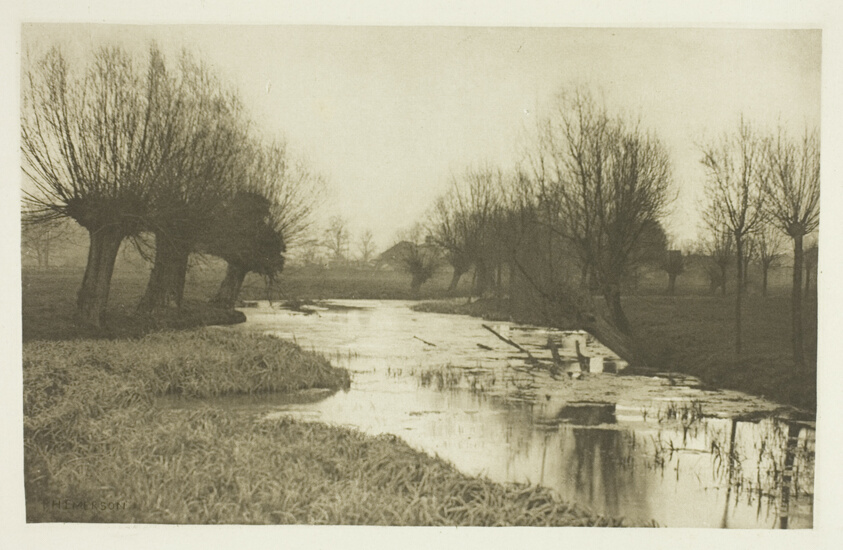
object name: Photograph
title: A Backwater on the Lea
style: 19th century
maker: Peter Henry Emerson (English, born Cuba, 1856–1936)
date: 1880s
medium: Photogravure, plate VII from the album "The Compleat Angler or the Contemplative Man's Recreation, Volume I" (1888)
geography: England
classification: photogravure; photomechanical process; photography; photograph